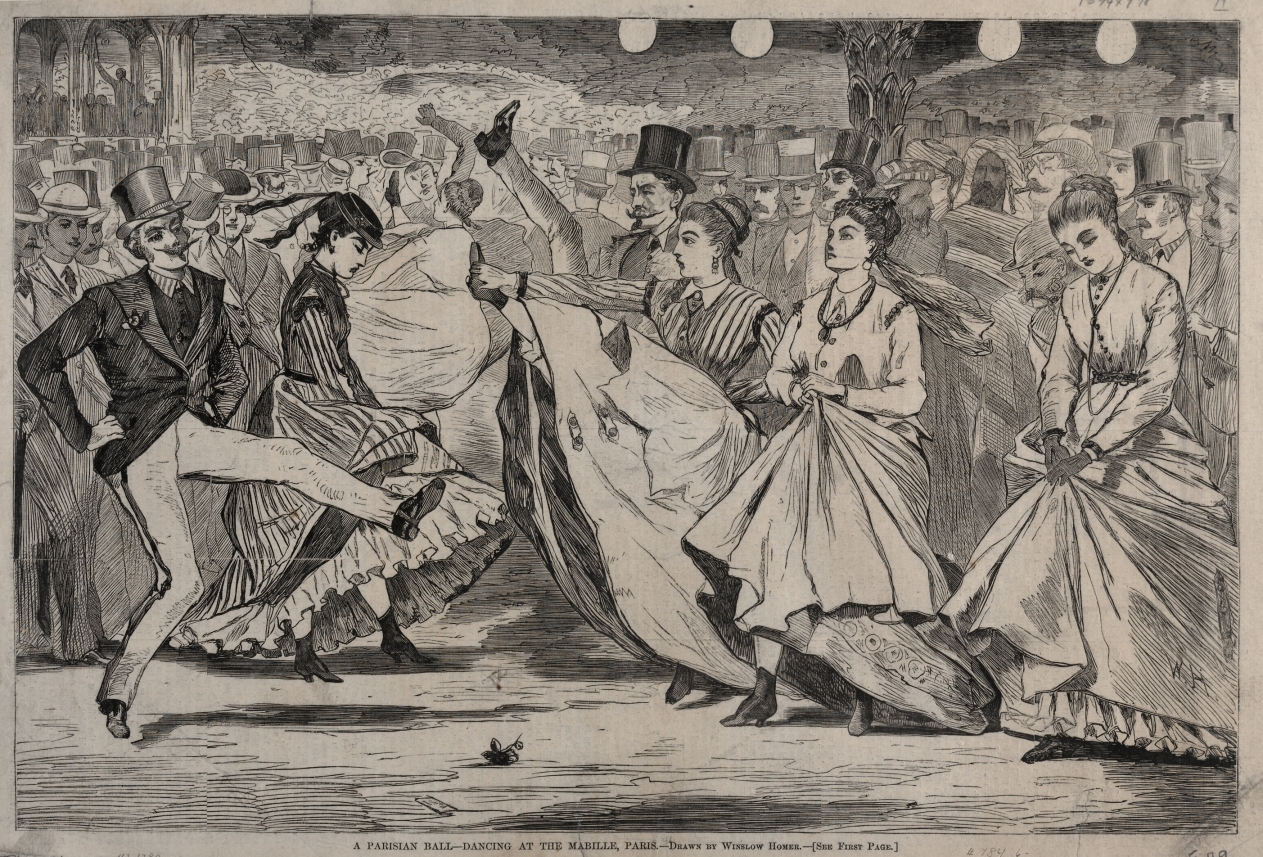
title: A Parisian Ball - Dancing at the Mabille, Paris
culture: America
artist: Winslow Homer (American, 1836–1910)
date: 1867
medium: wood engraving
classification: Print